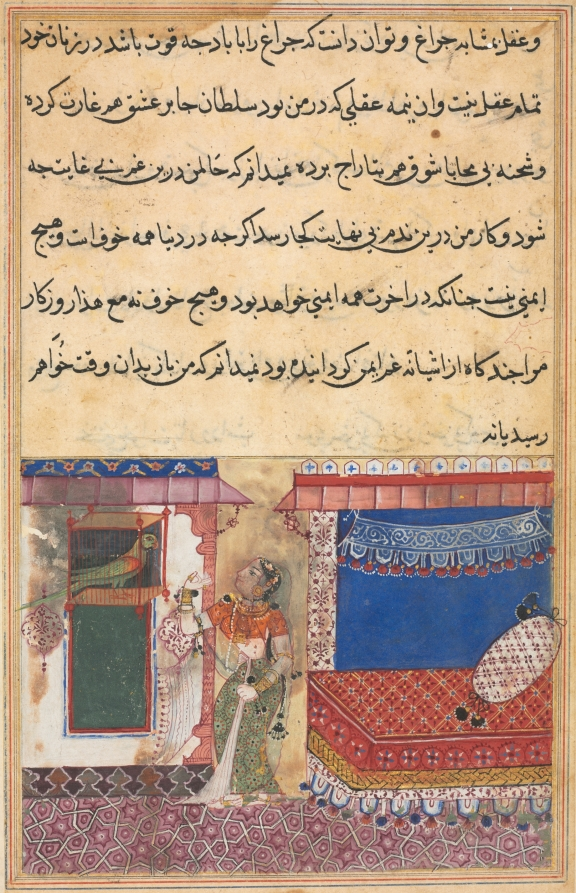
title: The Parrot Addresses Khujasta at the Beginning of the Eighteenth Night, from a Tuti-nama (Tales of a Parrot)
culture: Mughal India, court of Akbar (reigned 1556–1605)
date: c. 1560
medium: gum tempera, ink, and gold on paper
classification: Painting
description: When like a red-turbaned king the sun disappeared under the canopy in the west and like a silver-robed monarch the moon appeared on the throne in the east, Khujasta went to ask Tuti’s permission to leave. The parrot replied that his mistress Khujasta should devote herself to her obligations of propriety, just like the three extraordinary companions of the prince. Her interest piqued, Khujasta asked Tuti to tell her about them. He then launched into a story about the benefits of loyalty and generosity that lasted all night.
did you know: The medallion pattern of Khujasta’s skirt is a convention of an earlier painting style